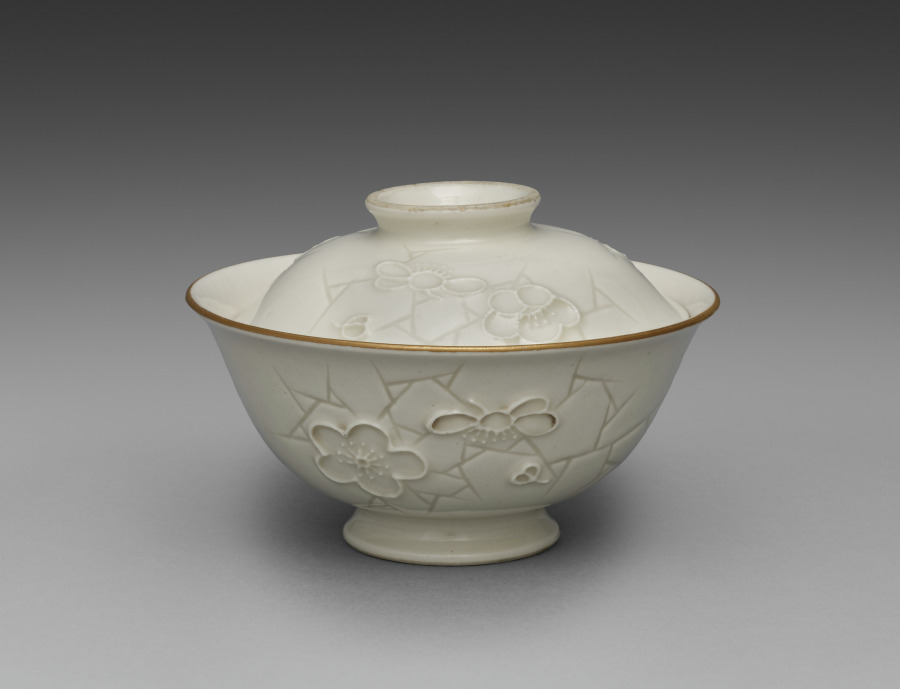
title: Covered Bowl from Dining Set with Plum Blossoms and Cracked-Ice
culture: Japan, Meiji period (1868–1912)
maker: Seifū Yohei II (Japanese, 1844–1878)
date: c. 1875–78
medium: Porcelain with molded designs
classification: Ceramic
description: Each item in this set has a delicate low-relief design of flowering plum branches over scattered, intersecting lines meant to resemble the cracked-ice surface of a frozen body of water and is signed on the base in gold pigment. While Yohei II produced many fine works in underglaze blue, like those produced by Kiyomizu Shichibei, he also made works in quite different styles later in his career, from the early 1870 s. In 1873, he was appointed purveyor to the Industrial Center of Kyoto Prefecture, a designation associated with Kyoto’s efforts to reach an international market through the port of Kobe; and from 1875 until his death, he was involved in national-level projects to present Japanese ceramics across the world. It was during this period that Yohei III was apprenticed to Yohei II, and it has been suggested that this set may in fact be an early example of Yohei III’s work, which he signed with his teacher’s name. Decorated with flowers resembling Japanese textile motifs, the set calls to mind the design of Yohei II’s pair of vases with plum blossoms in the Victoria and Albert Museum. Here, the elaborate trees created for a formal public exhibition setting have been translated into the approachable blossoms of the genteel domestic environment. While the designs are consistent across the pieces, each raised flower petal and pistil and each incised line in the ice was done by hand, so the cups, bowls, and dishes are similar yet unique. The bottoms of two boxes once identified the set’s owner, but the information has been deliberately obscured with black ink. However, inscriptions still visible appear to indicate two occasions, once at the end of July 1886 , and once again in June 1916 , when parts of the set were requested from Hokura in Niigata Prefecture. The location corresponds to a neighborhood in the present-day city of Jōetsu. The surname Tsuji 辻 also appears on a paper tag affixed to one of the box cloths. Future research may possibly reveal more about their provenance. A vase by Yohei III in a private collection combines the formal grandeur of the Yohei II vases in the Victoria and Albert Museum with the gentler design of this dining set, placing flowering plum trees against soft, scalloped-edge clouds resembling those in golden screens.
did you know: The dining wares have a creamy white coloration that the four boxes containing them identify as Korean in style.